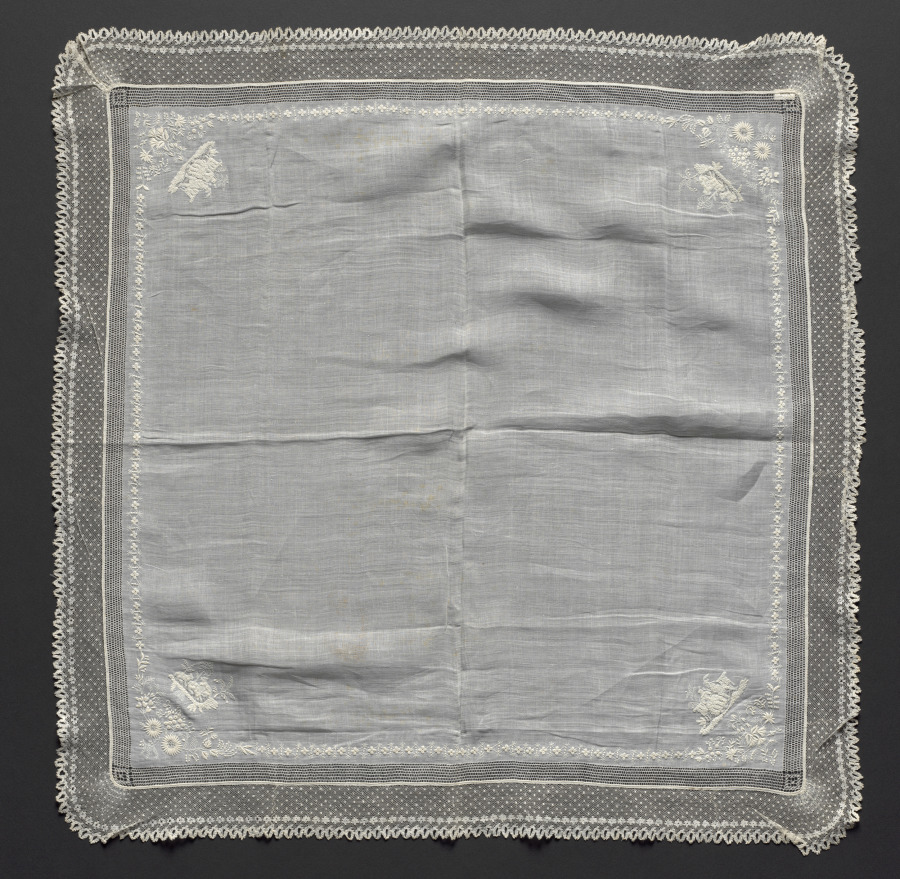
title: Lace Handekrchief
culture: France or Flanders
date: 1800–1820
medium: Plain weave linen ground: bobbin lace (Lille lace) edging and embroidery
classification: Embroidery